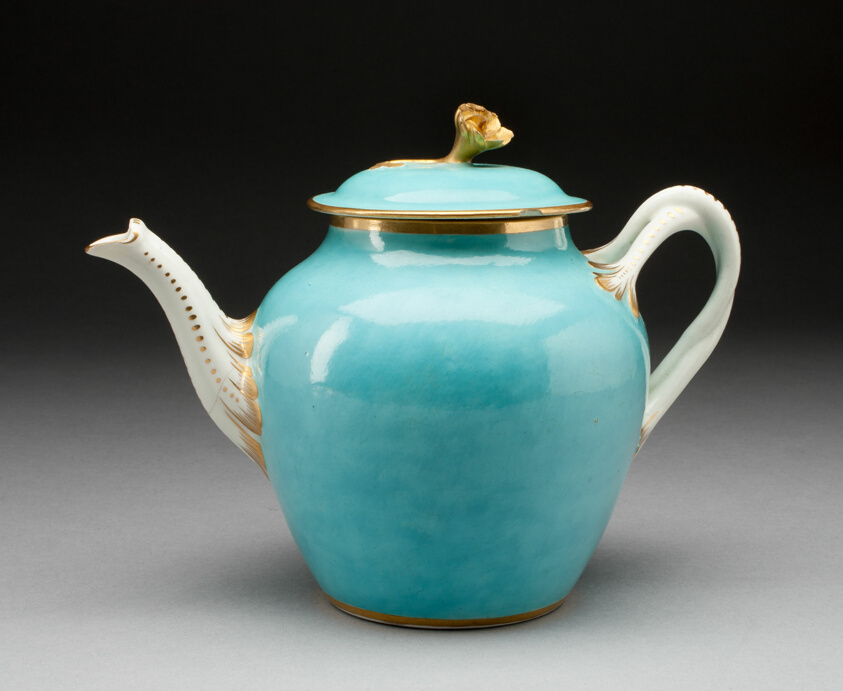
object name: Ceramics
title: Teapot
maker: Worcester Porcelain Factory (Warmstry House Period, 1751–1783); Worcester, England, founded 1751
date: c. 1770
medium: Soft-paste porcelain with turquoise ground and gilding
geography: Worcester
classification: teapot; teaware; ceramics; porcelain; european decorative arts